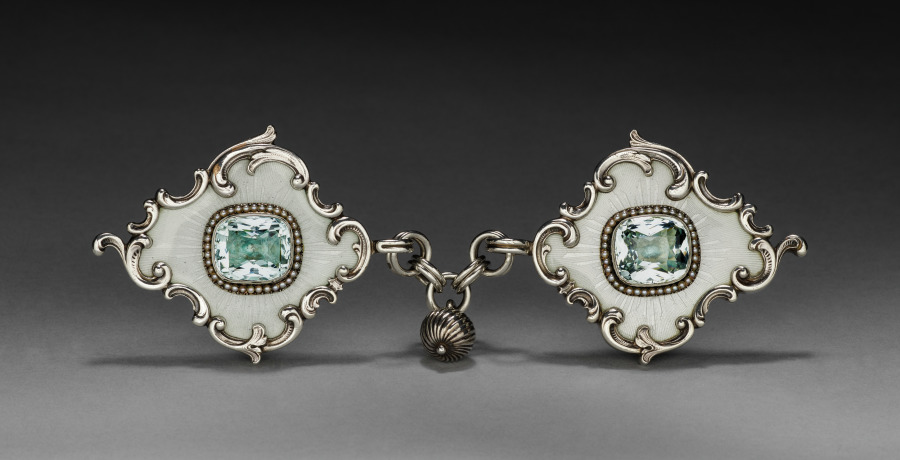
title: Cloak Clasp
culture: Russian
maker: House of Fabergé (Russian, 1842–1918)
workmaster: Henrik Wigström (Russian, 1862–1923)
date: c.1903–8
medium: aquamarine, half pearl bezel, oyster guilloché enamel, silver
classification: Jewelry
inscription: Inscribed with the Cyrillic initials “HW”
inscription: “88” silver standard